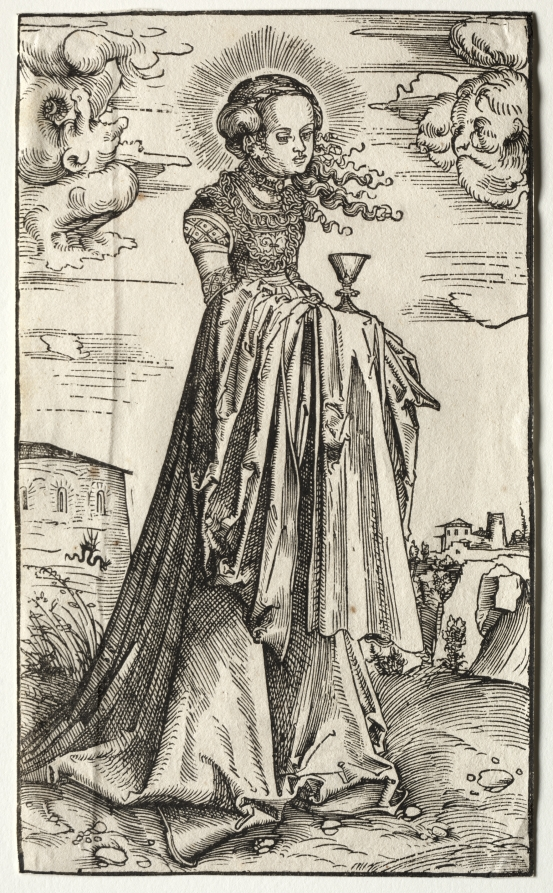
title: St. Barbara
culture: Germany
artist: Lucas Cranach (German, 1472–1553)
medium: woodcut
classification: Print